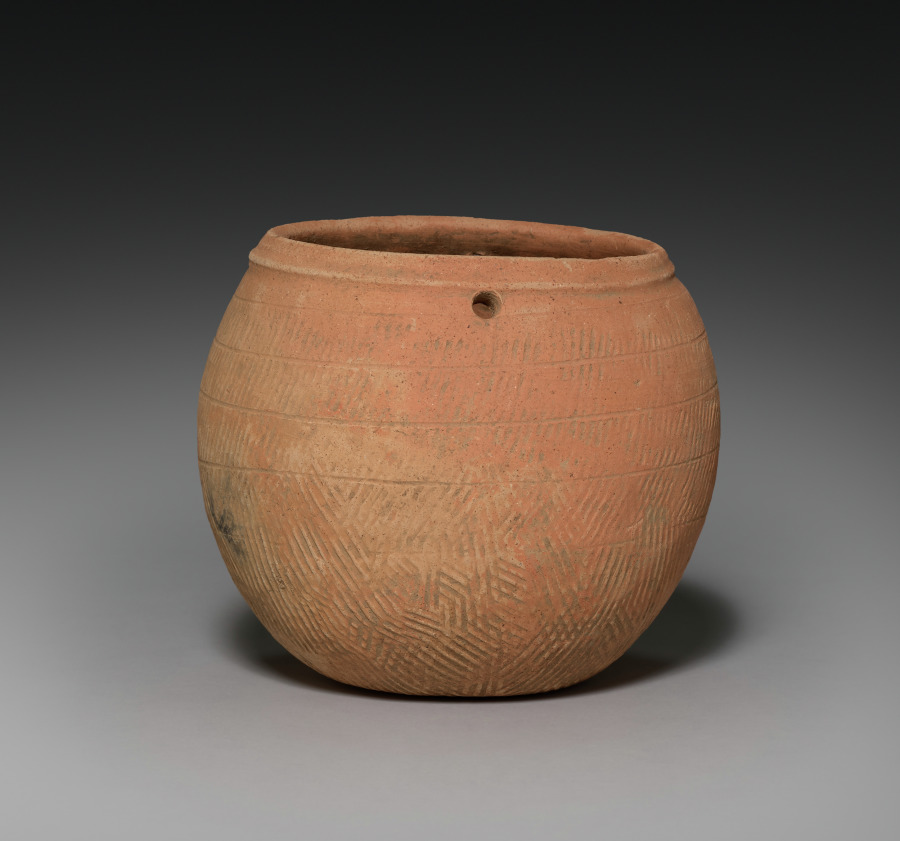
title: Lidded Vessel with Loop Handles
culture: Korea, Iron Age (c. 300–57 BCE)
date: 300–1 BCE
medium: earthenware, with impressed, paddled, and incised decoration and red slip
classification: Ceramic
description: This small storage jar was hand built from coils of clay before it was finished on a potter's wheel. The thick, vertical ridges covering the surface were impressed into the wet clay using a carved wooden paddle. This network of raised lines was then intersected by four incised lines coursing around the bulbous form and separating the body into lower and upper areas with deft visual simplicity. Such direct, effective design solutions to ceramic decoration appear frequently in early Korean ceramics. The two perforations in the upper body were no doubt used to help secure the lid to the body with cord.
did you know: Closed kilns built on hills became widely used for producing this type of pottery vessel in Korea during the Three Kingdoms period.